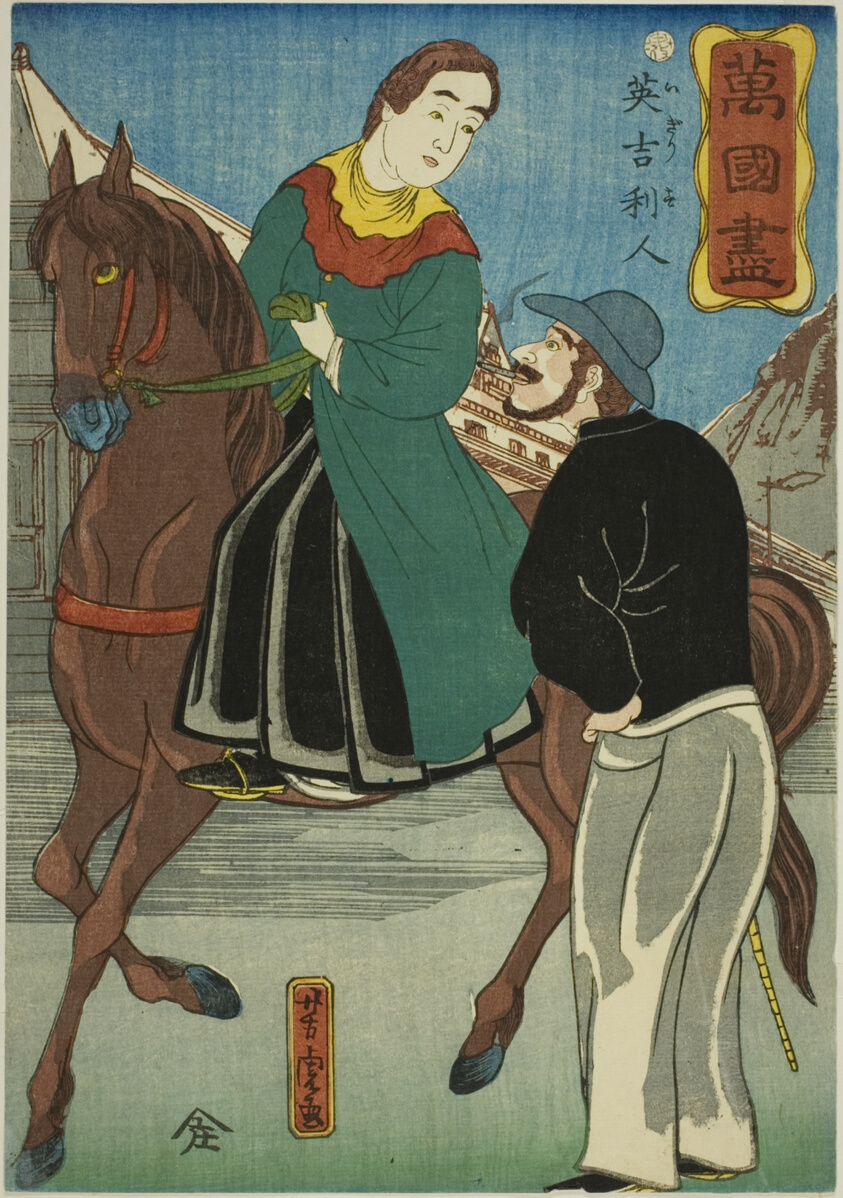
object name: Print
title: English (Igirisujin), from the series "A Collection of Various Countries (Bankoku zukushi)"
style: Japanese (culture or style)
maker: Utagawa Yoshitora (Japanese, active c. 1836-87)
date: 1860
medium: Color woodblock print; oban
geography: Japan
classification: woodblock print; print; asian art